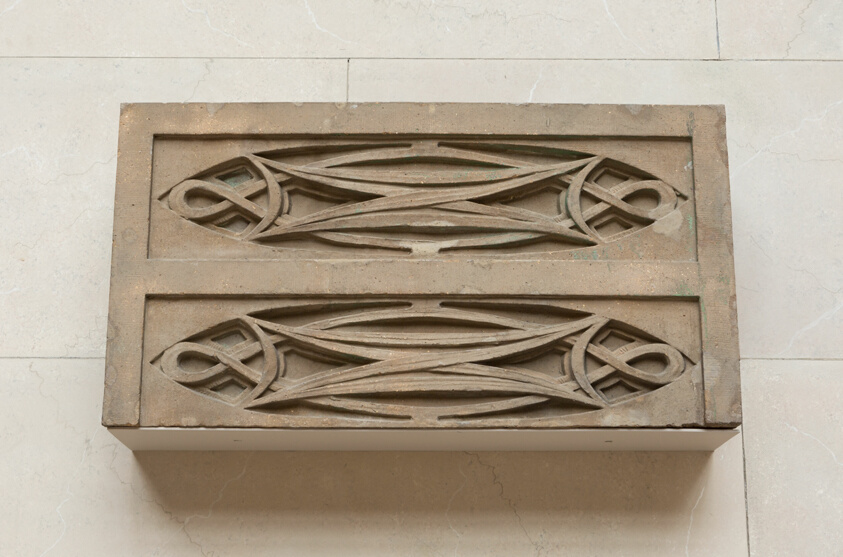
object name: Architectural fragment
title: Garrick Theatre: Block of stringcourse from first floor loggia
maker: Adler & Sullivan, Architects, American, 1881-1895; Designer: Louis H. Sullivan, American, 1856-1924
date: 1891/92 (demolished 1961)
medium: Terra-cotta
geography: Randolph Street, 64 West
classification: earthenware; ceramics; architectural fragment; architecture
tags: Chicago